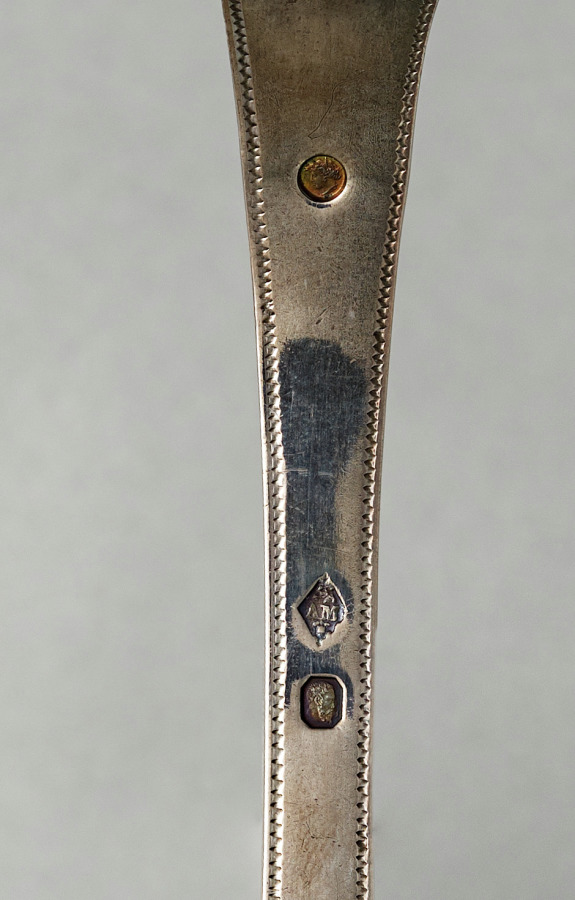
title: Sugar Spoon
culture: France, 19th century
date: 1819–1838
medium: silver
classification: Silver